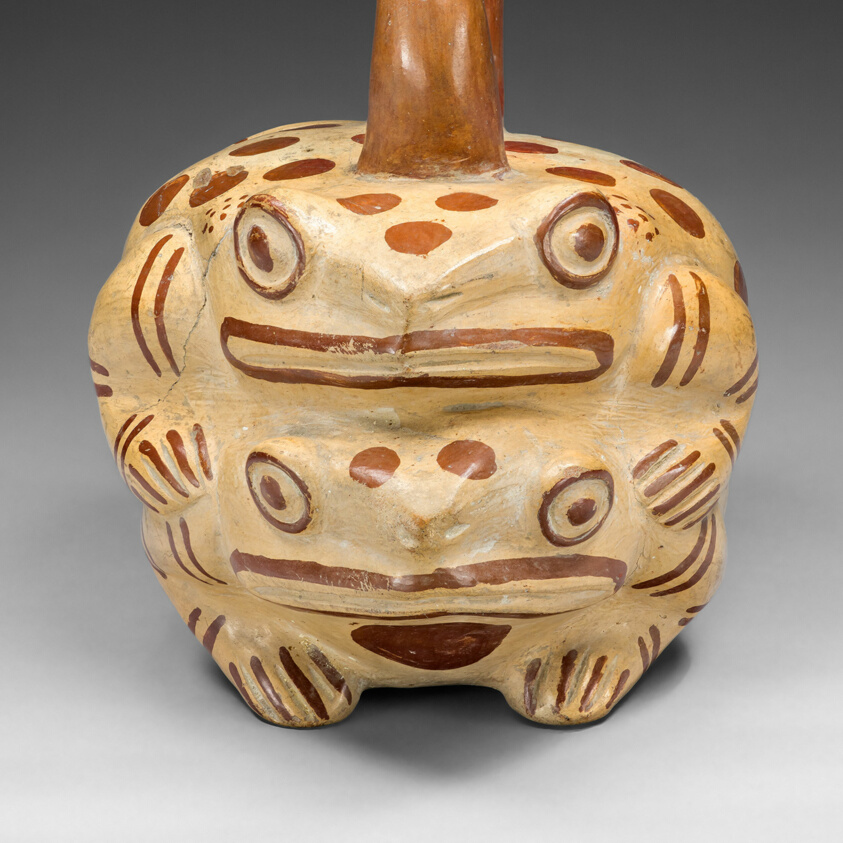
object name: Vessel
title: Vessel Depicting Frogs Mating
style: moche, mochica, early intermediate period, Pre-Columbian, americas, Arts of the Americas, andean, andes, south american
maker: Moche (North coast, Peru)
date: 100 BCE–500 CE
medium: Ceramic and pigment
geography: Peru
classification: earthenware; art of the americas; ceramics; vessel